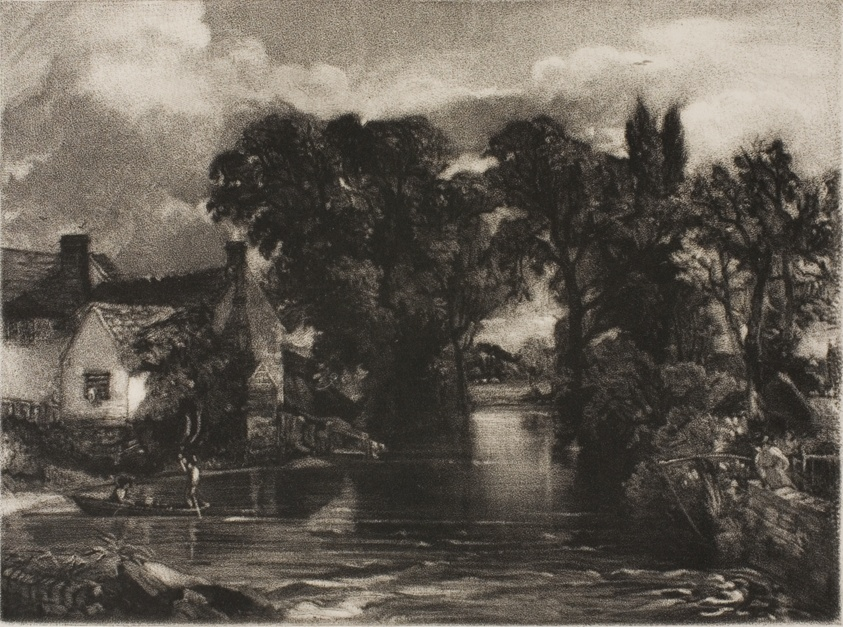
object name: Print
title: Mill Stream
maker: David Lucas (English, 1802-1881); after John Constable (English, 1776-1837)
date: 1831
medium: Mezzotint in black ink on heavy ivory wove paper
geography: England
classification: mezzotint; print; prints and drawing